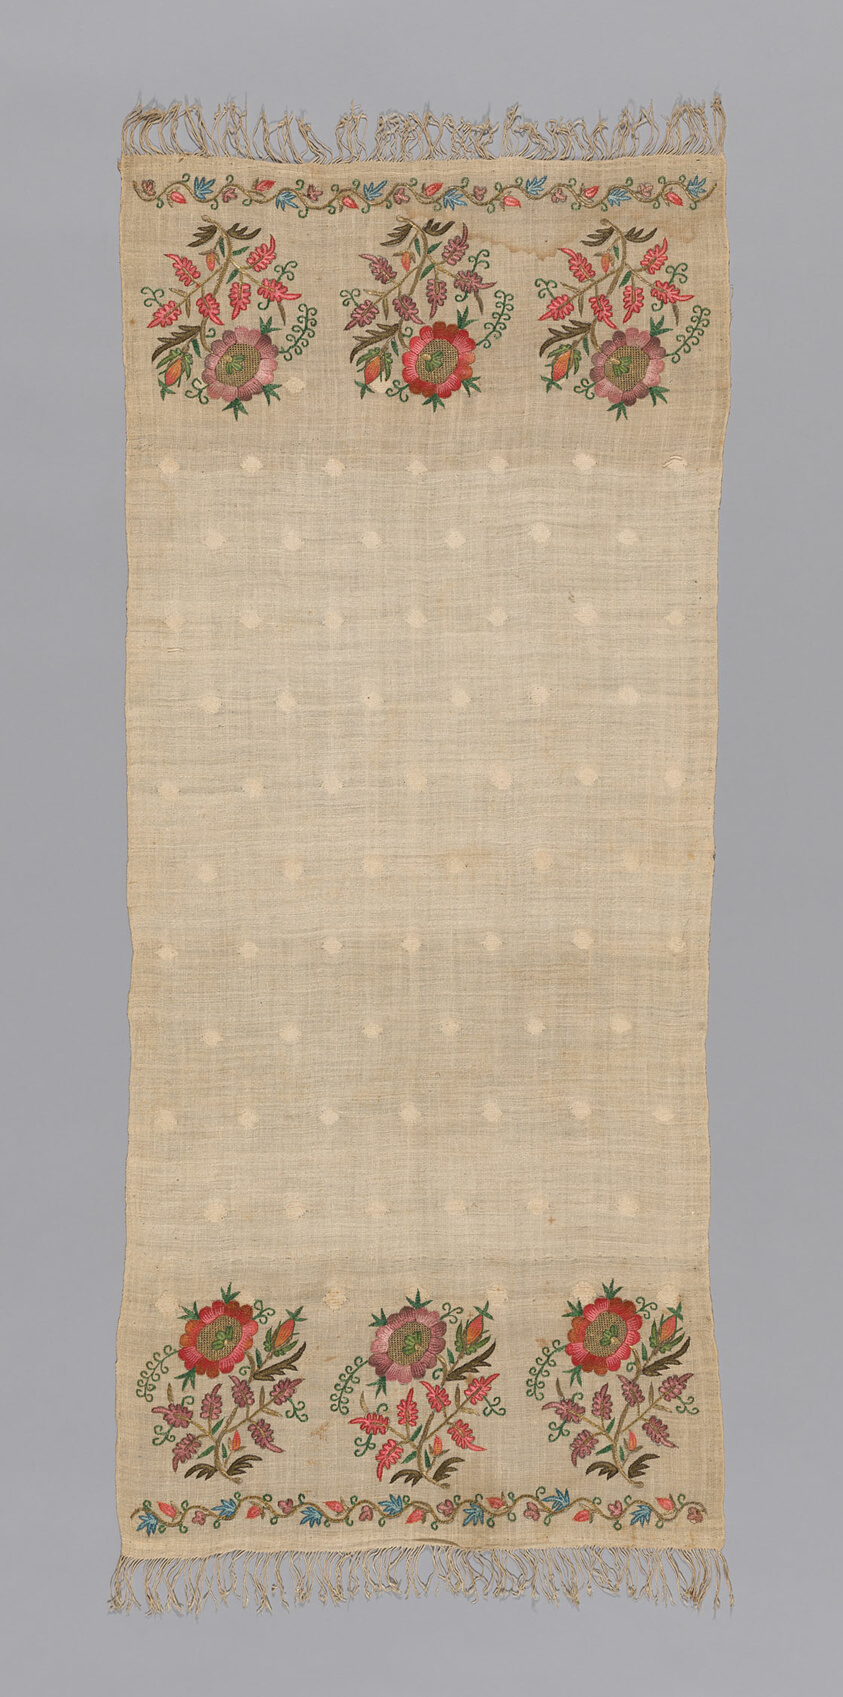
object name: Textile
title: Towel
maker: Turkey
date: 1875/1900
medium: Embroidered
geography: Turkey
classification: textile; needlework (visual works); weaving